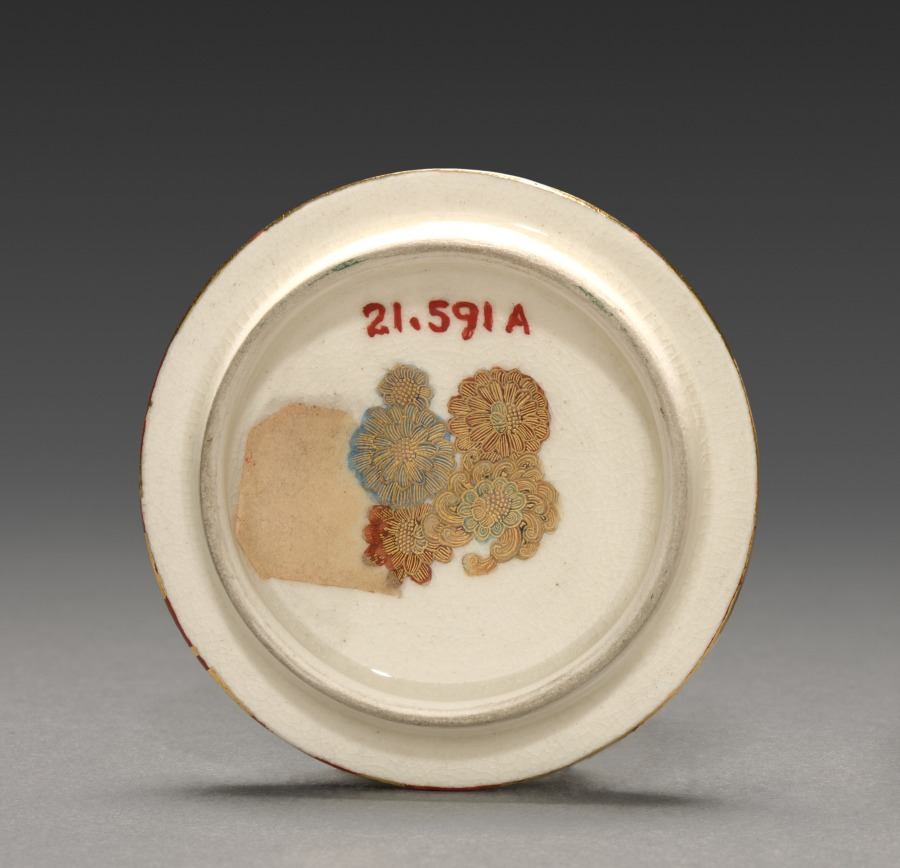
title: Jar with Butterflies (lid)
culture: Japan, Meiji period (1868–1912)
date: late 1800s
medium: pottery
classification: Ceramic